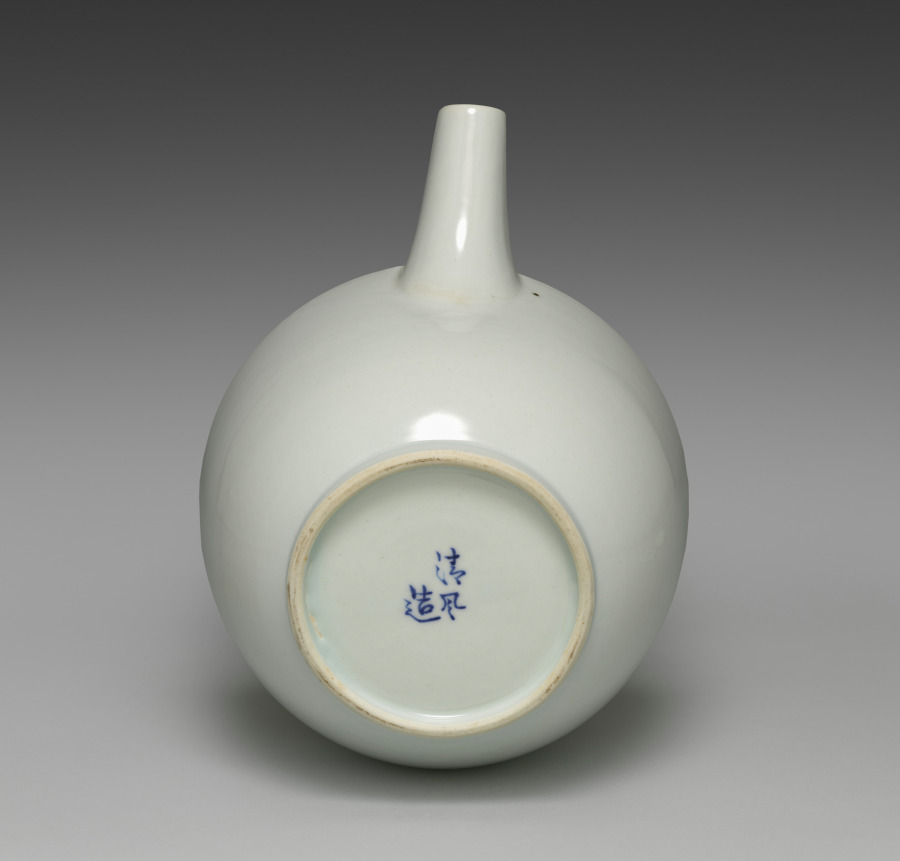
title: Sake Pourer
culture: Japan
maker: Seifū Yohei III (Japanese, 1851–1914)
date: c. 1887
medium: Porcelain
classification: Ceramic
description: This sake pourer has a wide basin with a low foot; a generous spout open across the top half; a flat, round lid with a small knob recessed flush to the top of the container; and a tall, arched handle that meets the container where the top joins the basin at a sharp angle. This vessel is glazed but otherwise undecorated. Unlike the creamy white color of some Yohei III works, the white of this sake pourer has the bluish cast typical of porcelains produced in Kyoto.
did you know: Seifū Yohei III signed this sake pourer in underglaze blue on the base.